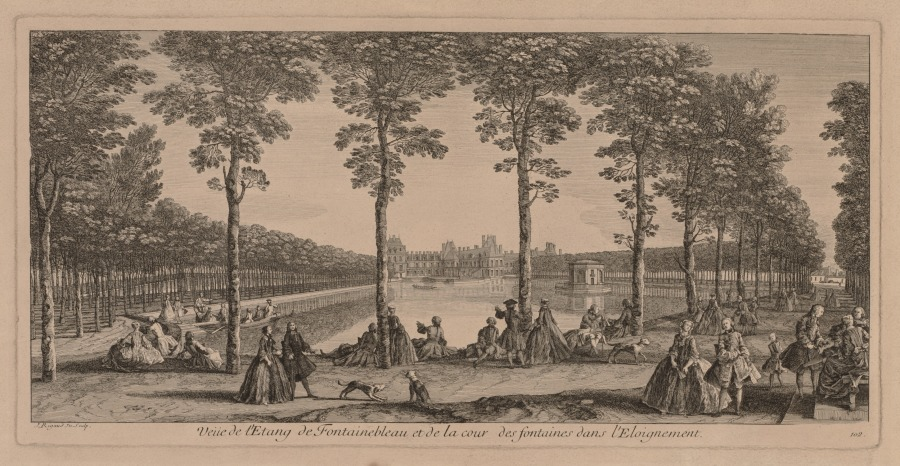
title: The Pool at Fontainebleau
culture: France, 18th century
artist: Jacques Rigaud (French, 1681–1754)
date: c. 1720–50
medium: engraving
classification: Print